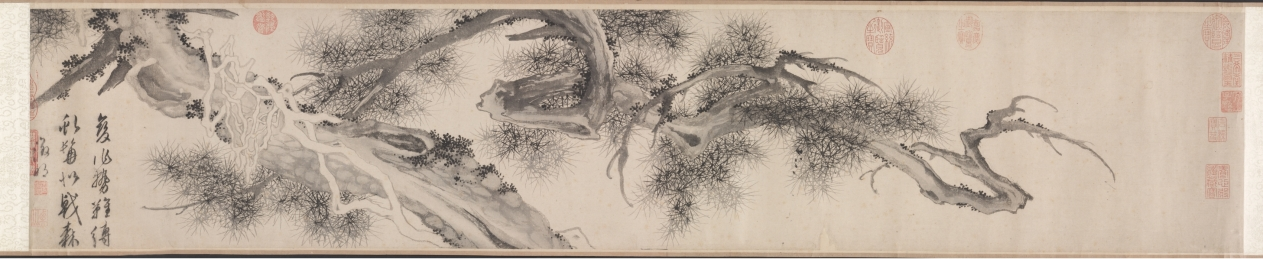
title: Old Pine Tree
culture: China, Ming dynasty (1368–1644)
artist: Wen Zhengming (Chinese, 1470–1559)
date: late 1530s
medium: handscroll; ink on paper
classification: Painting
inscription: 變化勢難縛，虬髯似戟森. 徵明 [印]文徵明印; 衡山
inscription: 2 partial seals of Qian Shisheng 錢士昇 (1575–1652)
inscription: 8 imperial seals: 6 of the Qianlong emperor (r. 1736–95); 1 of the Jiaqing emperor (r. 1796–1821); 1 of the Xuantong emperor (r. 1909–11).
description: Here the natural appearance of a gnarled and vine-entangled pine has been transformed into a rhythmic abstraction of brushstrokes and ink tonalities, with unifying opposites—opening and closing, rising and falling—that provide the design across the horizontal scroll. The artist's inscription reads: "The force of change beyond restraint; / The dragon's whiskers are likened to a forest of spears."